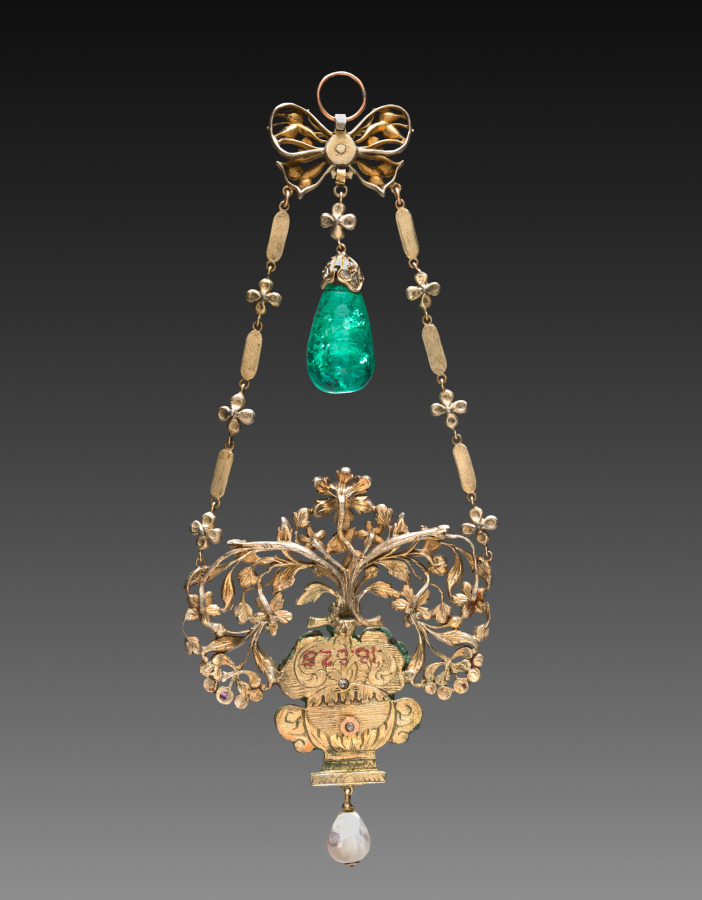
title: Pendant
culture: Continental, 18th century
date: 1700s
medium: metal and enamel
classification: Jewelry